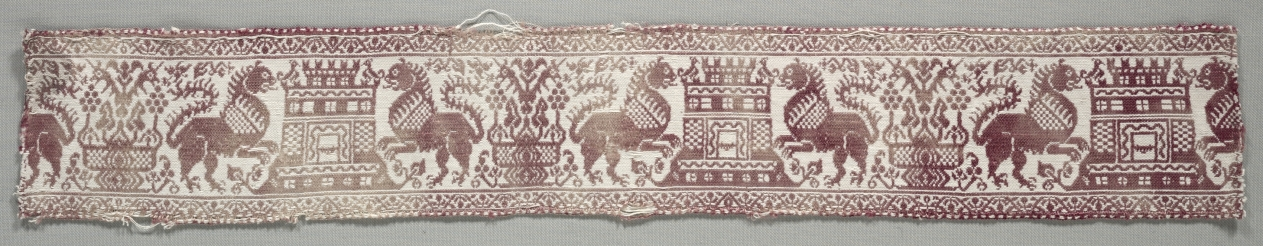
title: Band from Towel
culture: Italy, Perugia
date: 1500s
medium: embroidery; silk on linen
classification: Embroidery